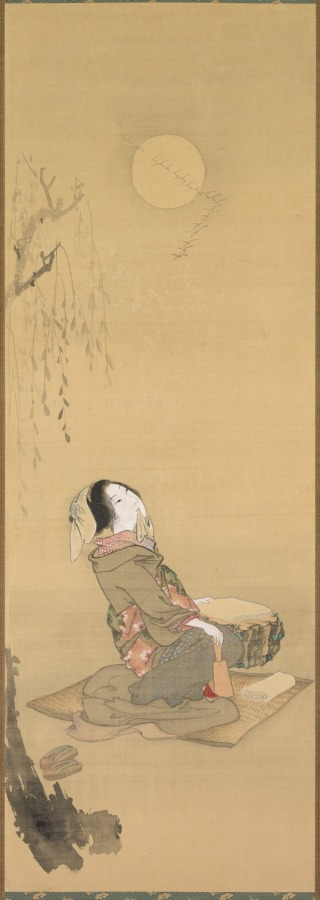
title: Woman Looking at the Moon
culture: Japan, Edo period (1615–1868)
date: 1800s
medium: hanging scroll; ink and color on silk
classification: Painting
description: In this scene, a woman pauses in her task of fulling cloth (pleating or gathering cloth to make it full) to gaze at the moon just as a flock of geese pass over. Perhaps overcome by the moment, she bites the end of her kerchief. The simple elements of fulling blocks, geese, and a full moon are traditional symbols of autumn in Japanese art. The pounding of the silk also has erotic connotations in East Asian painting. Although it is not signed, the style resembles work by painter Teisai Hokuba, known for his ukiyo-e or “pictures of the floating world.” Hokuba was an eminent disciple of the famed artist Katsushika Hokusai (1760–1849). The woman's white face appears to reflect the moon's surface. In Japan, the autumn harvest moon has many romantic associations and is a popular subject of poetry. In mid-autumn a Moon-Viewing Festival is held on the fifteenth night of the eighth lunar moon, which is regarded as the Harvest Moon. This festival became popular during the Edo period, when the citizens of the city of Edo enjoyed a festival in honor of the moon held on the banks of the Sumida River.